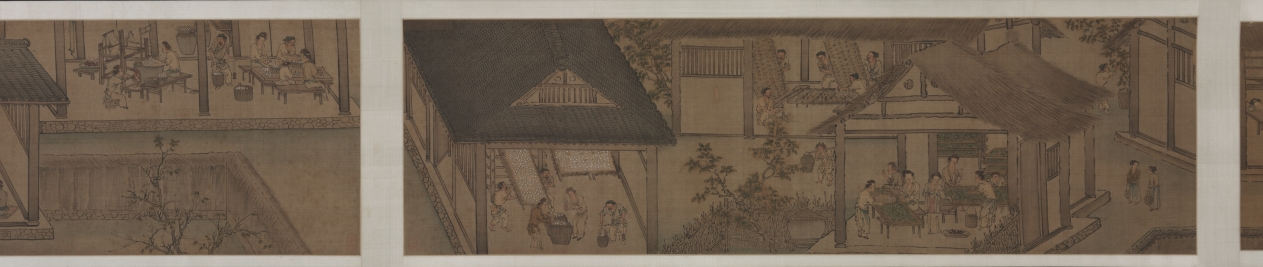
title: Sericulture (The Process of Making Silk)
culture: China, Southern Song dynasty (1127-1279)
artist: attributed to Liang Kai (Chinese, mid-1100s–early 1200s)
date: early 1200s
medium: Handscroll; ink and color on silk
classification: Painting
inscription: 3 colophons and 7 seals of Ch'eng Ch'i (20th c.).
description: By the Southern Song period, the economic center of the silk industry had shifted to the lower Yangzi delta, while the north continued to be troubled by wars. Divided into three sections, the handscroll illustrates 14 steps in the process of making silk, from the raising of silkworms to the weaving of silk cloth. The scroll’s scenes follow the illustrations of Lou Shou’s (1090–1162) Pictures of Tilling and Weaving (gengzhi tu), the first recorded painting of this genre, which was conceived in Hangzhou around 1145. However, in the Cleveland painting the artist groups several scenes of sericulture together under the roof of an open structure.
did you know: The painting is attributed to Liang Kai, a court artist active from about 1201 to 1204 at the Imperial Painting Academy in the city of Hangzhou, a major silk weaving center from that time to the present day.